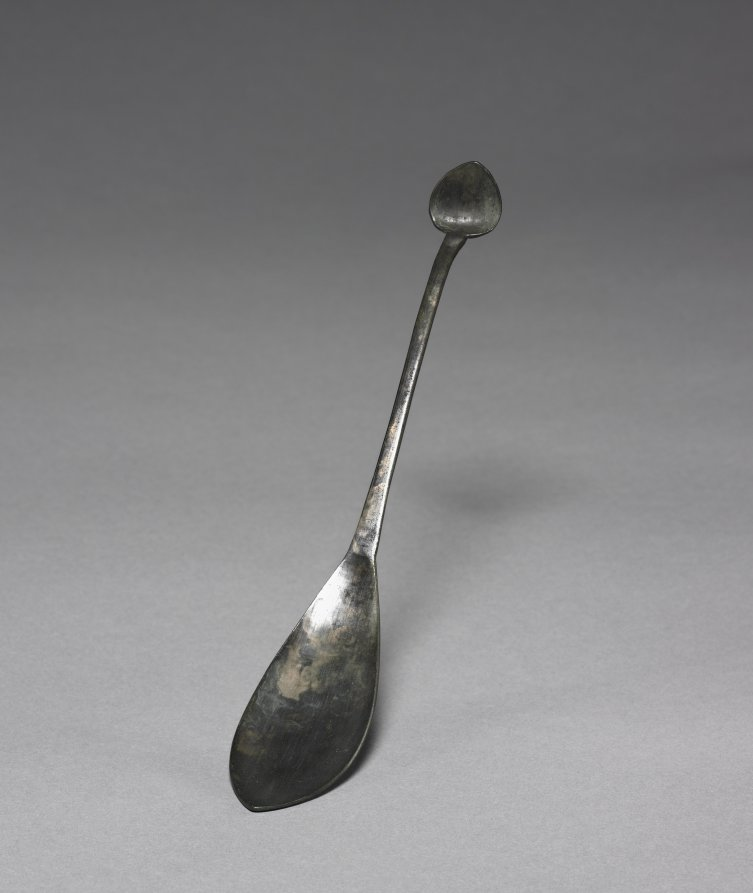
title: Spoon with Dual Heads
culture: Korea, Goryeo dynasty (918–1392)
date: 918–1392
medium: bronze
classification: Metalwork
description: This bronze spoon has dual heads: one is large, and the other small. The smaller head is believed to have been used to hold a small dose of liquid medicine.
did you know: Bronze spoons are the most common burial item. Scholars have proposed that toward the end of the 14th century, Koreans enjoyed meat-based soups more than any other dishes, explaining why spoons became common household items as well as burial goods.